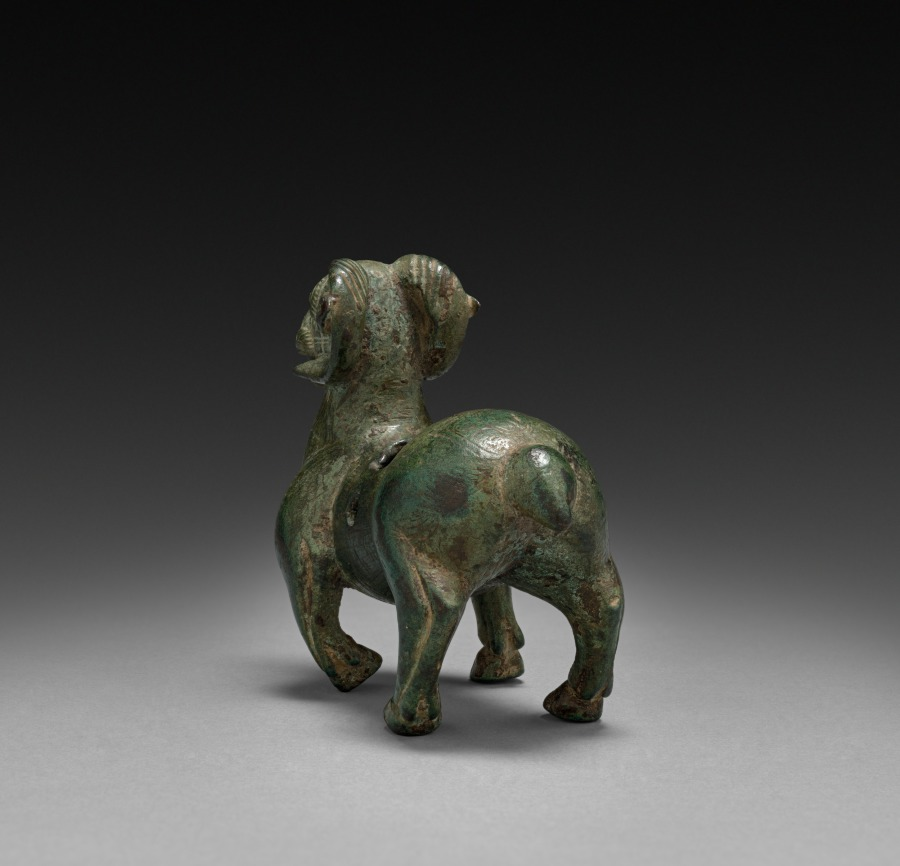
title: Zun in the Shape of a Ram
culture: China, Han dynasty (202 BCE–220 CE) to Six Dynasties (265–587 CE)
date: 206 BCE–220 CE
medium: bronze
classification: Sculpture